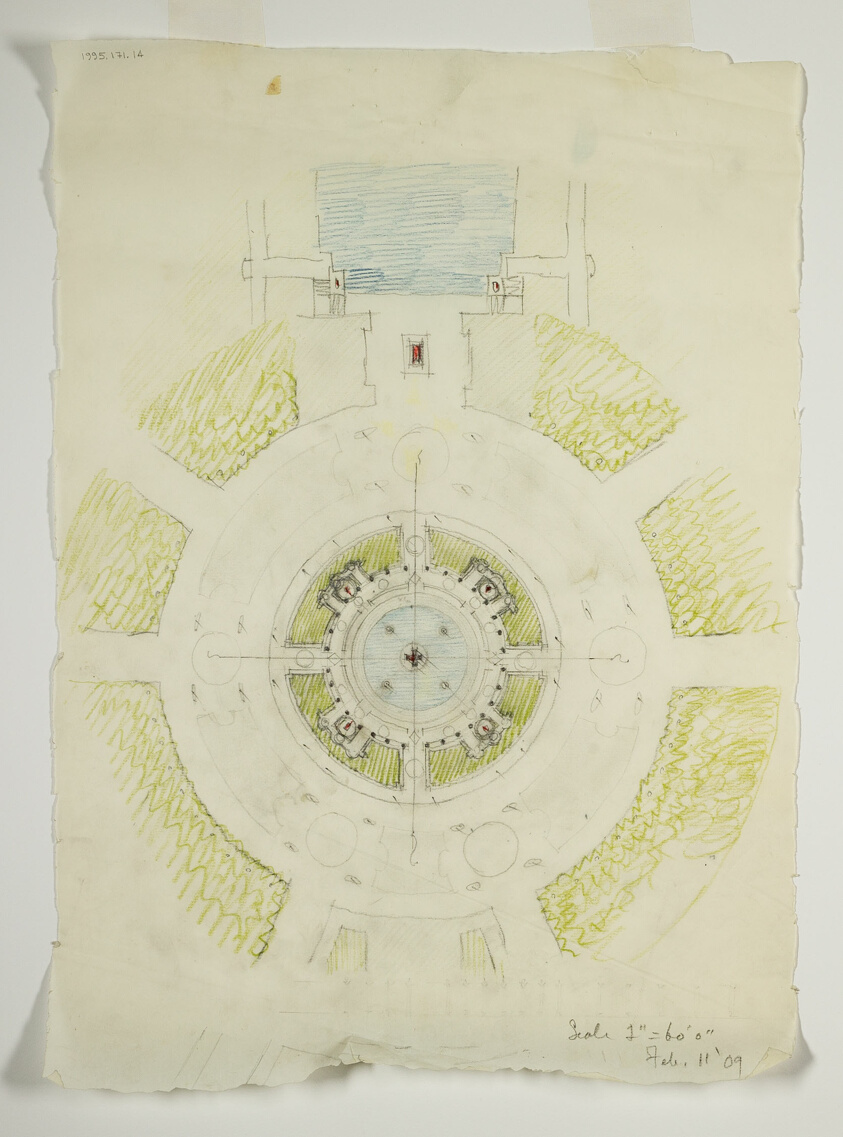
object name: Architectural Drawing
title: Potomac Round Point, Washington D.C., Circular Pool Plan Sketch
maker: D. H. Burnham & Co.; American, 1891-1912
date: 1909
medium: Graphite and colored pencil on tracing paper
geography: Washington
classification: design drawing; architectural drawing